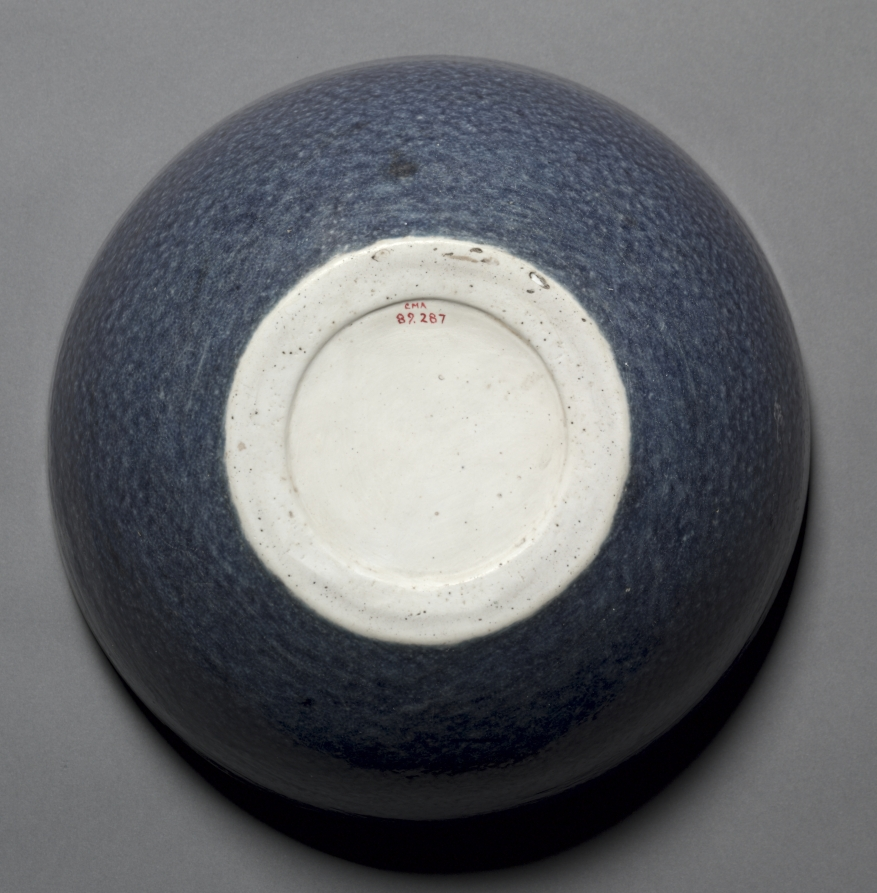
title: Dice Bowl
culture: China, Jiangxi province, Jingdezhen, Ming dynasty (1368-1644), Xuande mark and period (1426-1435)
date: 1426–35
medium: porcelain with mottled blue glaze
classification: Ceramic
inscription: 大明宣德年製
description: The Chinese connoisseurs use the poetic term "snowflake blue" to describe the mottling effects of white blotches amid tones of blue colored with cobalt oxide. Such aesthetic effects were achieved by blowing the glaze through a bamboo tube onto the ceramic surfaces.